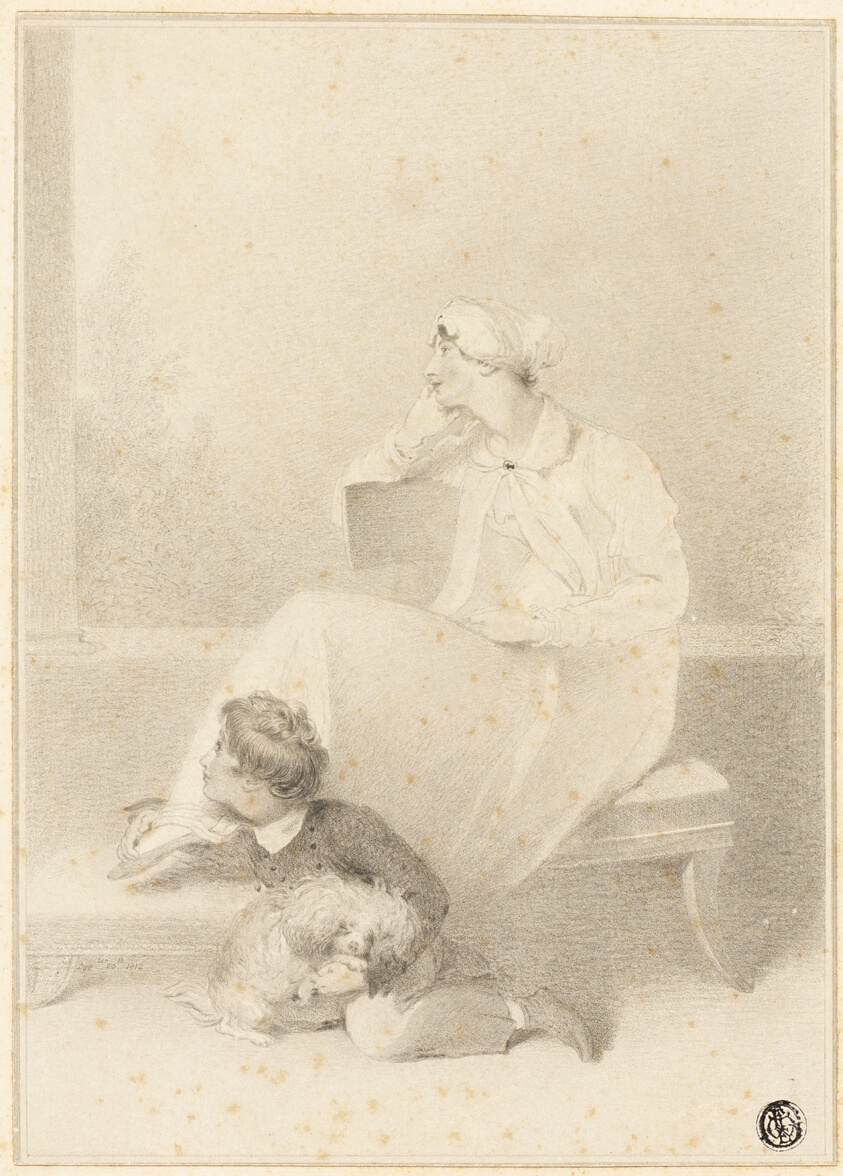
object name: Drawing and Watercolor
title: Woman, Child and Dog Looking Far Away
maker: Maria Louisa Catherine Cecilia Cosway (English, 1759-1838)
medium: Black chalk on ivory wove paper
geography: England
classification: chalk; drawings (visual works); prints and drawing